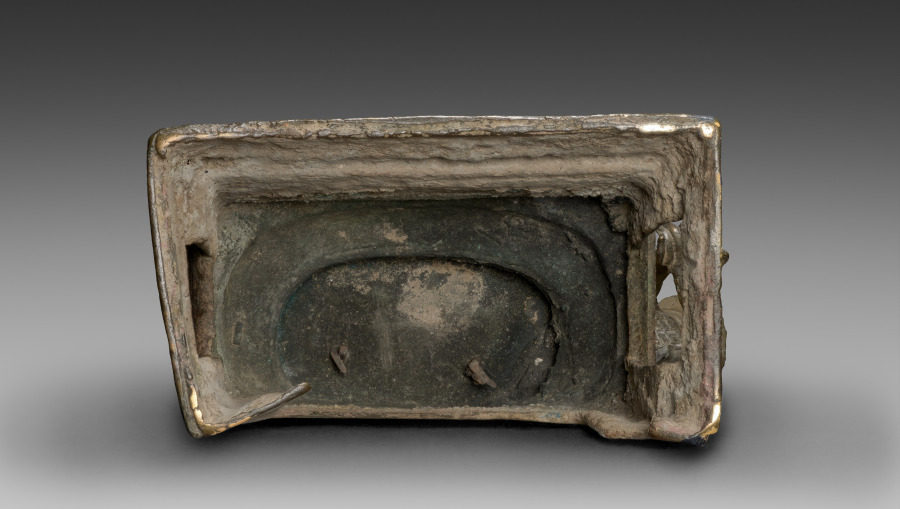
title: Standing Buddha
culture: India, Kashmir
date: c. 900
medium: brass with silver and copper inlay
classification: Sculpture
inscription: inscribed with the name of the monk who owned it: Lhatsun Nagaraja (active from c. 998 to 1026)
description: The slender athletic Buddha extends one foot slightly off the lotus pedestal, suggesting his humanity enters our world from his transcendent state. With his right hand he signals that we should have no fear. The smooth signs of wear on the sculpture indicate that it was worshiped in Kashmir, where water and other ablutions were poured over sacred images during rituals. The Tibetan inscription on the pedestal states that it belonged to a royal monk named Nagaraja (Tibetan, active about 998–1026). Sculptures like this contributed to the transmission of Buddhism from India to Tibet and served as artistic models.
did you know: The Buddha grasps the end of his robe in his left hand.